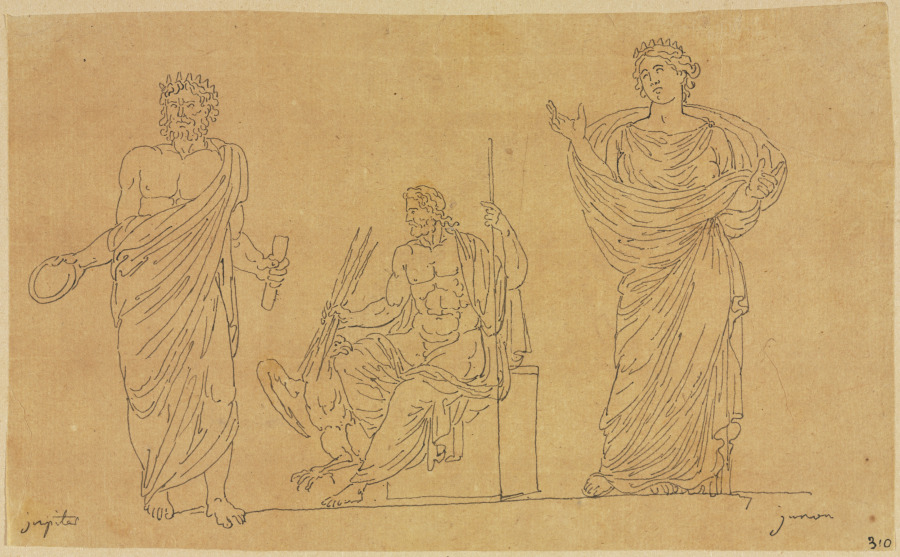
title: Gods and Goddess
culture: France, 18th-19th Century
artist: Jacques-Louis David (French, 1748–1825)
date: fourth quarter 1700s or first quarter 1800s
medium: pen and black ink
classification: Drawing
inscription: [by artist?], lower left, in black ink: jupiter ; [by artist?], lower right, in black ink: junon ; lower right, in black ink: 310